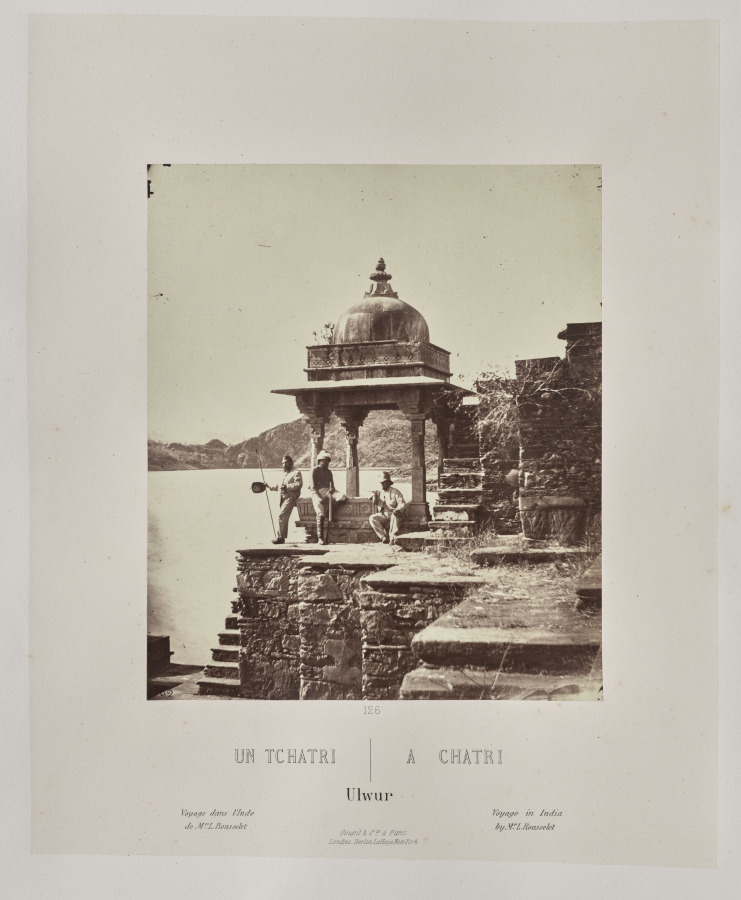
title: A Chatri, Ulwur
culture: France, 19th century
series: India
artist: Louis-Théophile Marie Rousselet (French, 1845–1929)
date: 1865–68, published 1869–70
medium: Albumen print from glass plate negative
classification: Photograph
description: Concerned that his drawings did not do justice to the splendor of India’s monuments, Rousselet learned photography in India that year, a remarkable accomplishment. He proved to be a talented photographer with a sophisticated sense of composition. The scenes in this volume sweep across sites of Sultanate, Rajput, and Mughal power in northern India, from the sacred Hindu city of Varanasi on the Ganges River to Alwar in Rajasthan. Also included are several scenes of industry and portraits of Indian rulers.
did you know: Louis Rousselet described himself as a “scientific traveler” when he went to India alone at age 18 in 1863 and stayed into 1868.